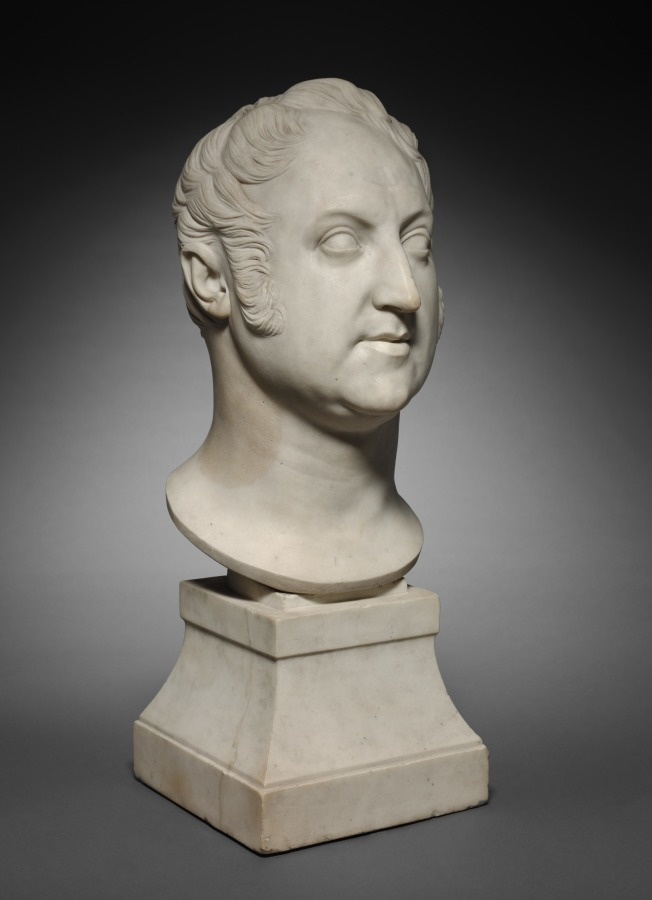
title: Bust of Rossini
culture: France, 19th century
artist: Pierre Jean David d'Angers (French, 1788–1856)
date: 1831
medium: marble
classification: Sculpture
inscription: inscribed at back of neck: A / Joachino Rossini de Pesaro / P.J. David d'Angers / 1831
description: Gioacchino Antonio Rossini (1792–1868) was a composer most famous for his comic operas. Although of Italian birth, much of Rossini's later life was spent in Paris, where he undoubtedly sat for this portrait for David d'Angers, whose ambition it was to sculpt portraits of all the famous people of his day.